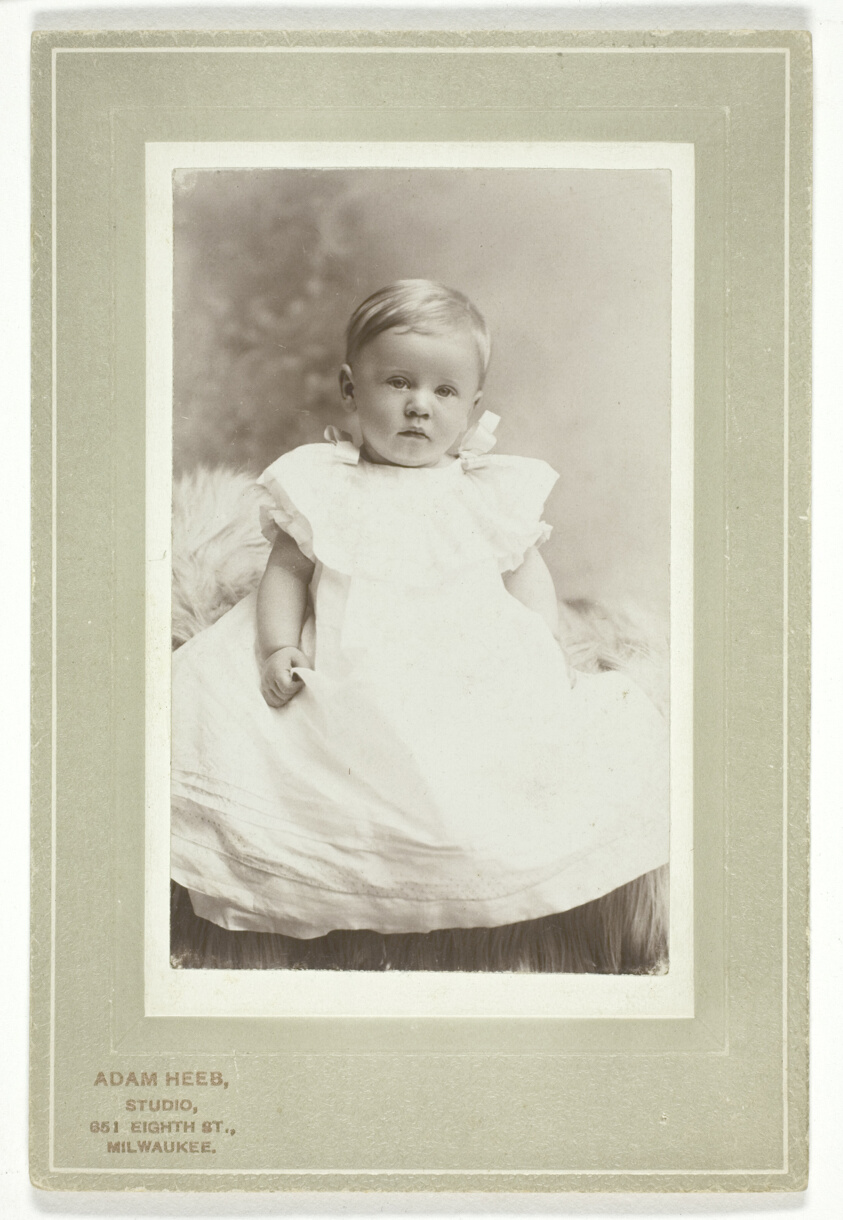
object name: Photograph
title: Hugo Tscharuack (in white christening dress)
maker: Adam Heeb (American, 1854-1918)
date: July 17, 1896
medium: Toned gelatin silver print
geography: United States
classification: photograph; photography